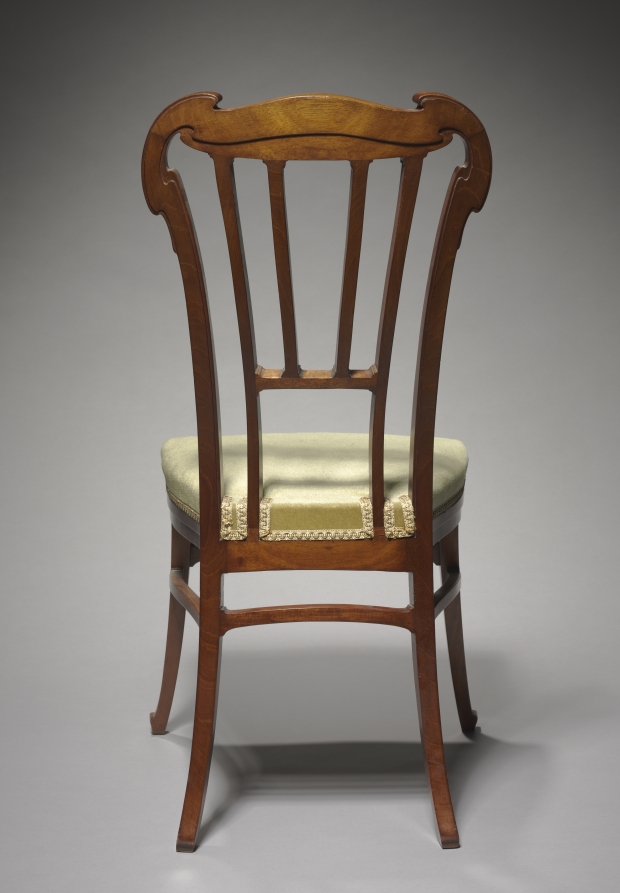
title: Chair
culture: Belgium, 20th century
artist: Victor Horta (Belgian, 1861–1947)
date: c. 1900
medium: mahogany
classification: Furniture and woodwork